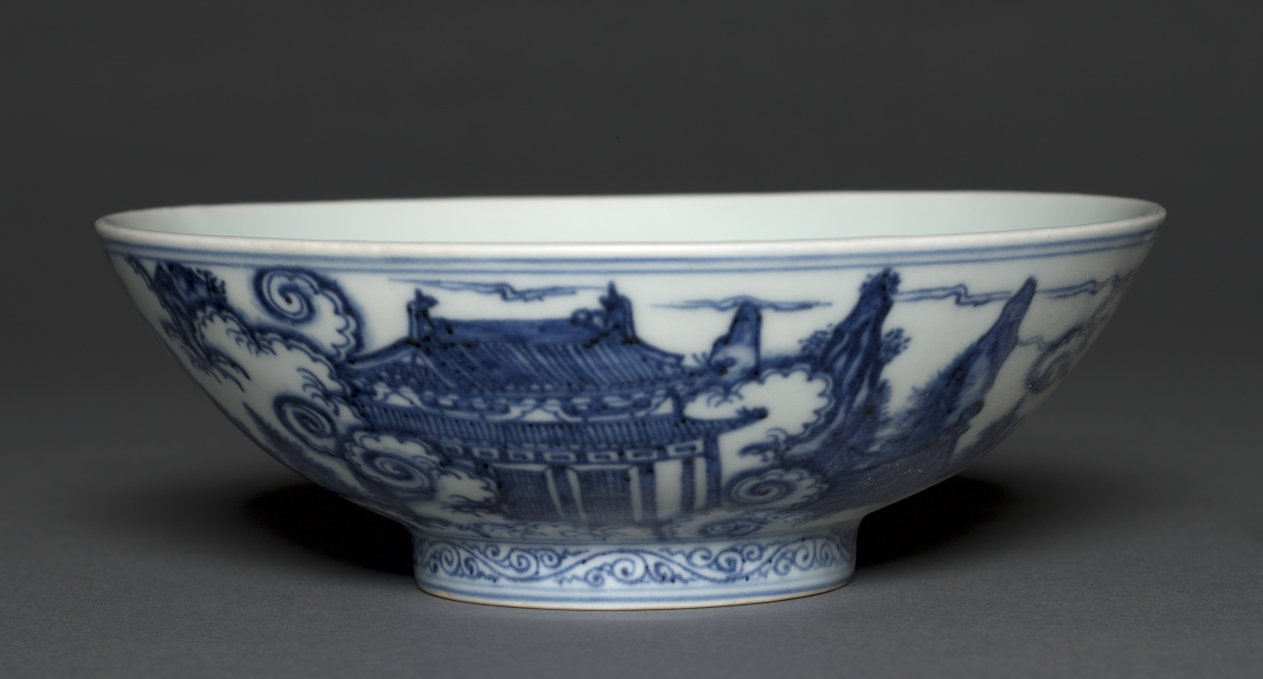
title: Bowl with "Land of Daoist Immortals" Scene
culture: China, Ming dynasty (1368-1644), Xuande mark and reign (1426-35)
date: 1426–35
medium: porcelain with underglaze blue decoration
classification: Ceramic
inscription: 大明宣德年製